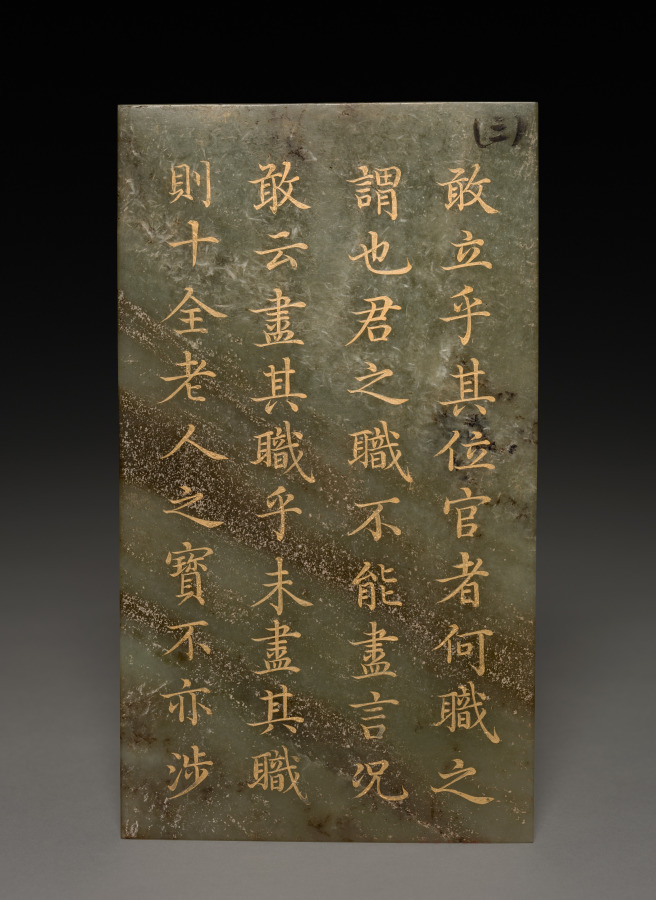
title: Tablet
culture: China, Qing dynasty (1644–1911), Qianlong reign (1736–95)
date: 1778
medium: jade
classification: Jade